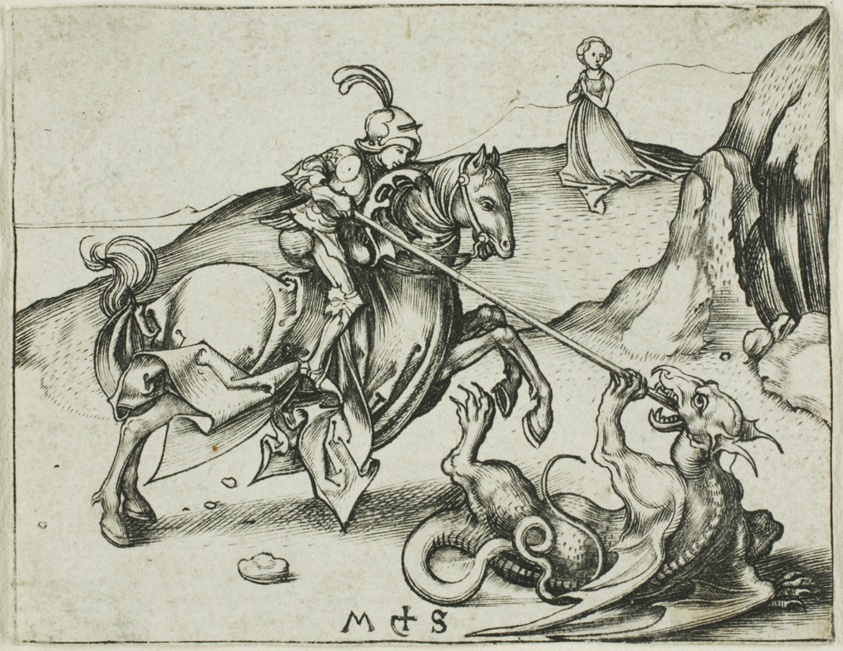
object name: Print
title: St. George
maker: Martin Schongauer (German, c. 1430/50-1491)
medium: Engraving on paper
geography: Germany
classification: engraving; print; prints and drawing